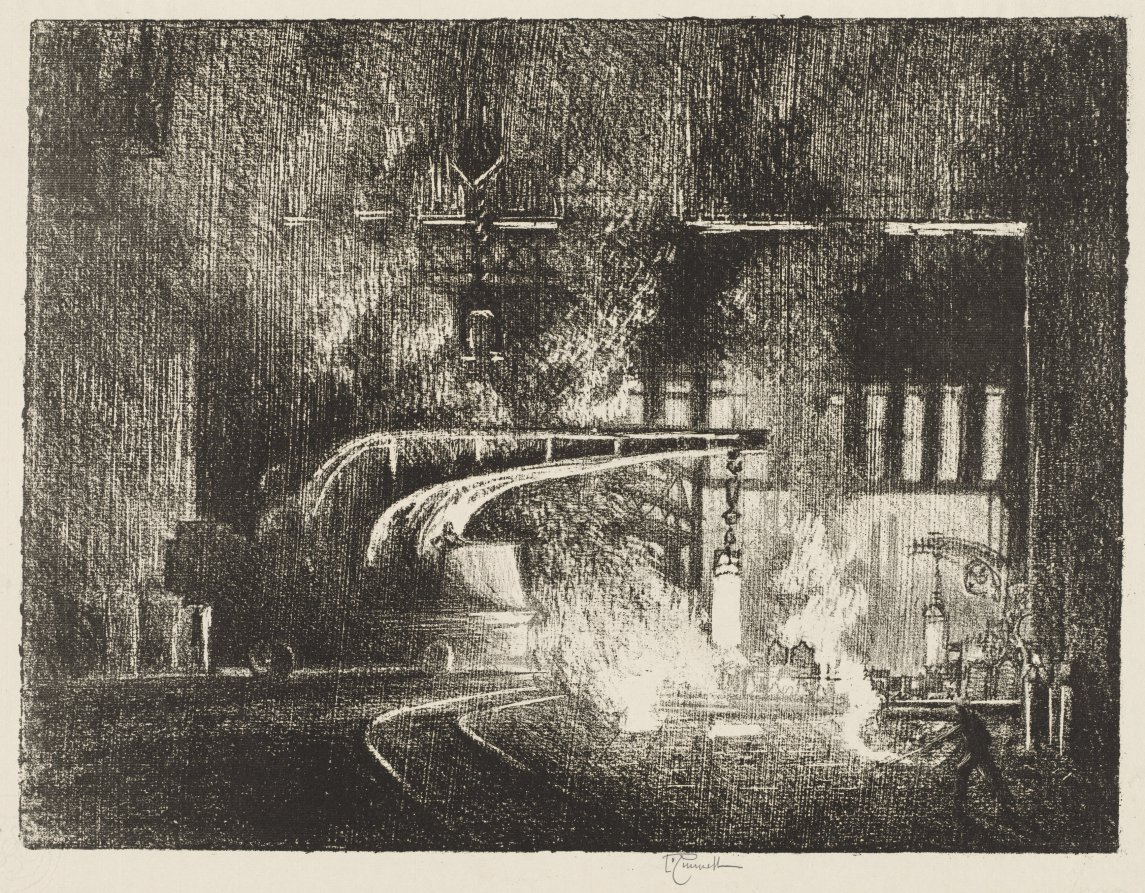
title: English War Work: The Perambulator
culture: America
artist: Joseph Pennell (American, 1857–1926)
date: 1916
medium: lithograph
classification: Print